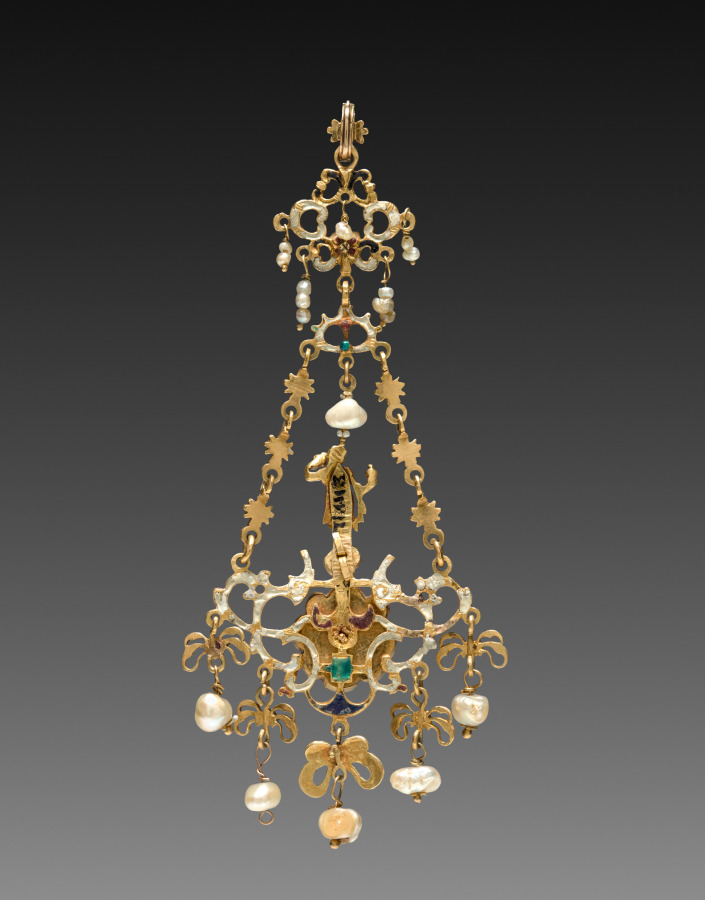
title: Pendant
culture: Italy, 17th century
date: 1600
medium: gold, enamel, pearls, rubies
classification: Jewelry